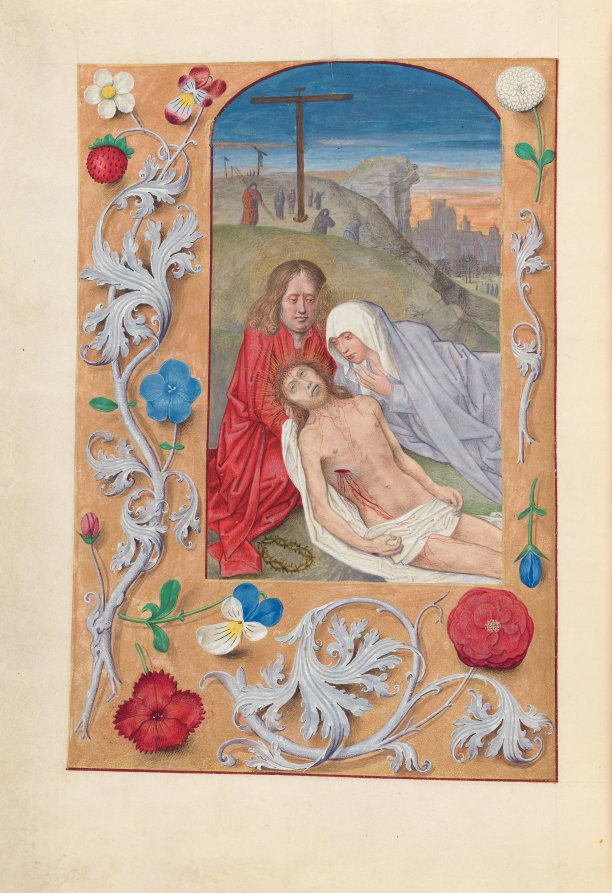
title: Hours of Queen Isabella the Catholic, Queen of Spain: Fol. 260v, Lamentation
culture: Flanders, Ghent and Bruges, late 15th century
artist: Master of the First Prayerbook of Maximillian (Flemish, c. 1444–1519)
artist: and Associates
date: c. 1500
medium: ink, tempera, and gold on vellum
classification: Bound Volume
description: This manuscript was illuminated by a circle of at least five highly organized manuscript painters active in the Flemish cities of Ghent and Bruges. The principal illuminator was Alexander Bening, who painted the majority of the book's miniatures. Manuscripts produced by this circle of artists are renowned for the decoration of their borders, which typically feature a rich variety of realistically-painted flowers, birds, and butterflies. This prayer book, called a book of hours, was intended not for a cleric, but for the private devotions of a lay person-in this case, Isabella the Catholic, Queen of Spain (1451-1504). Isabella's coat of arms embellishes the book's frontispiece. It is unlikely that the book was commissioned by the Queen herself; rather, she probably received it as a diplomatic gift from someone courting her patronage, perhaps Cardinal Francisco Jimenez de Cisneros. A Franciscan friar, Jimenez was dependent upon Isabella for his advancement, first to the post of Queen's confessor in 1492, and then to Archbishop of Toledo in 1495.